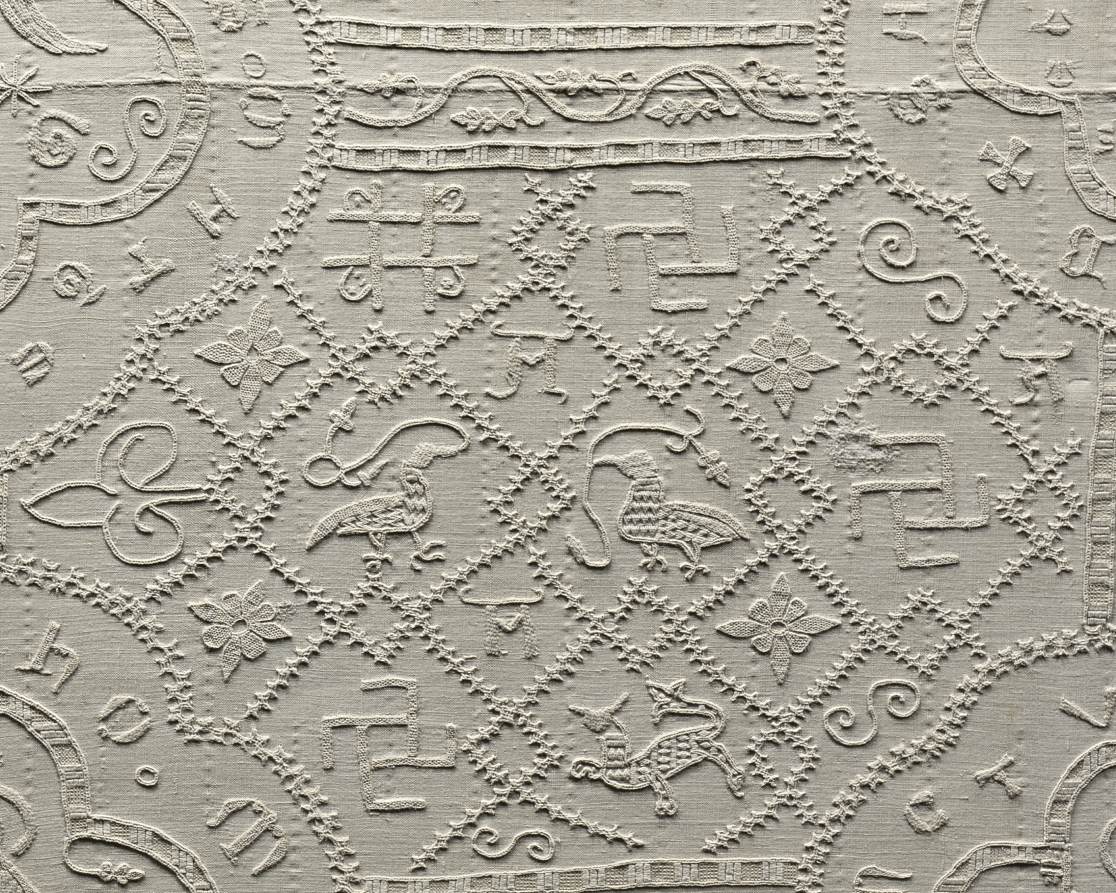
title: Altar Cloth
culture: Germany, Altenberg on the Lahn, Premonstratensian Convent, 14th century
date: c. 1350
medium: embroidery: linen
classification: Embroidery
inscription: various motifs enclosed in quatrefoils with identifying inscriptions in Gothic letters.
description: This large, embroidered altar cloth is one of the rarest, most important medieval church furnishings in existence. It was stitched by nuns in the Premonstratensian Convent in Altenberg on the Lahn River, north of Frankfurt, Germany, and was used to cover the church’s high altar in the weeks leading up to Easter. The cloth is an example of linen embroidery, a specialty of German nuns in the later Middle Ages. The Altenberg monastery church once had valuable furnishings; the high altar retable (a decorated frame with sculptures and paintings on the top of an altar) has survived, the main parts of which are now in the Städel Museum in Frankfurt, Germany.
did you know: When lit from behind, the previously hidden details emerge and the complex design becomes evident.